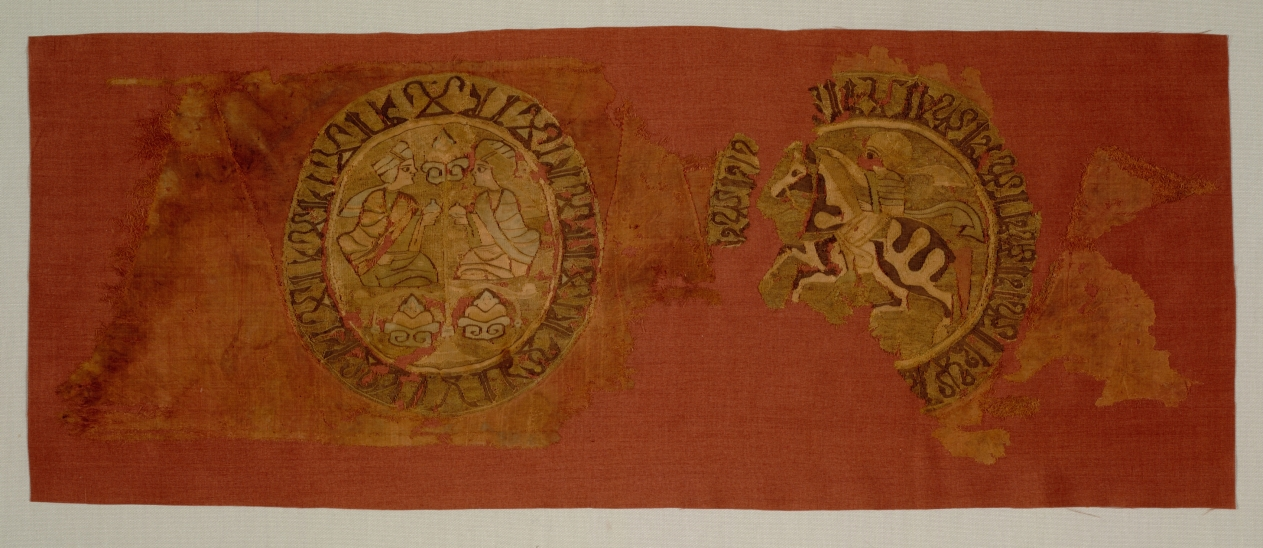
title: Celestial banquet hanging, from the tomb of Bishop Gurb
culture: Spain, probably Almeria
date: 1200–1284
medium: Silk and gold thread: plain weave with inwoven tapestry weave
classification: Textile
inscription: Arabic inscription bordering the roundels translates: "There is no god but God."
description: This rare silk fragment is from a luxurious hanging of brightly colored silk and shiny gold thread that displayed rows of figural roundels on a plain ground. The two turbaned men holding flasks flanking a palmette tree and the turbaned rider with a flying scarf are derived from the ancient Near Eastern imperial themes of the banquet and the hunt. The Arabic inscription framing each roundel proclaims, There is no god but Allah. This piece along with several others were reportedly found in the tomb of Bishop Gurb (died 1284) in the Cathedral of Barcelona in about 1890.